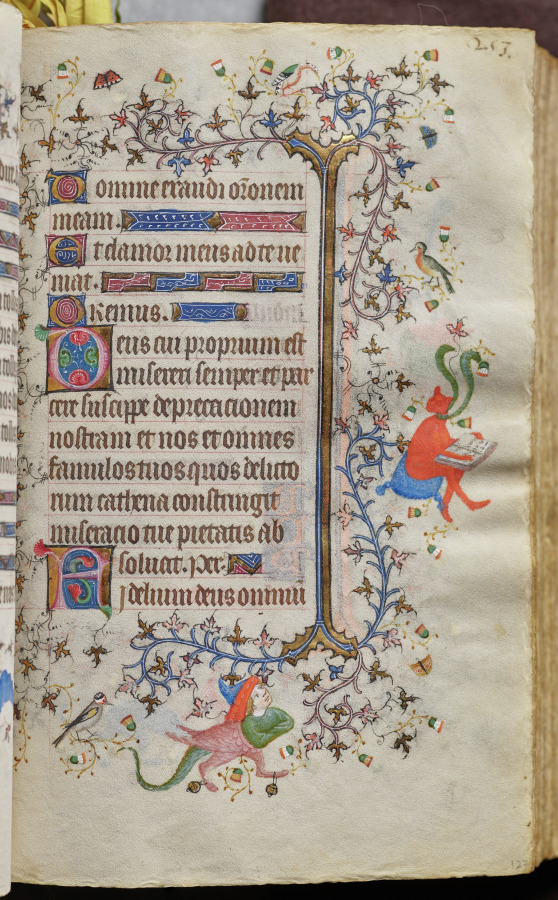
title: Hours of Charles the Noble, King of Navarre (1361-1425): fol. 127r, Text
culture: France, Paris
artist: Master of the Brussels Initials and Associates (French)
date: c. 1405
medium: ink, tempera, and gold on vellum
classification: Bound Volume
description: This precious volume was obviously highly prized by its owner, the French-born King of Navarre, who had his coat of arms painted on no less than twenty folios. Rather than directly commissioning this manuscript from a specific workshop, it seems that Charles the Noble acquired his book of hours -- perhaps ready-made for the luxury market -- while on a trip to Paris in 1404-05. A collaborative effort, six painting styles are evidenced within the pages of this codex, those of two Italians, two Frenchmen, and two Netherlanders. The painter who was responsible for the planning and decoration of the book, and who produced seventeen of the large miniatures, was a Bolognese artist known as the Master of the Brussels Initials. His principal assistant, responsible for most of the borders, was a Florentine who signed his name "Zecho" da Firenze on folio 208 verso.